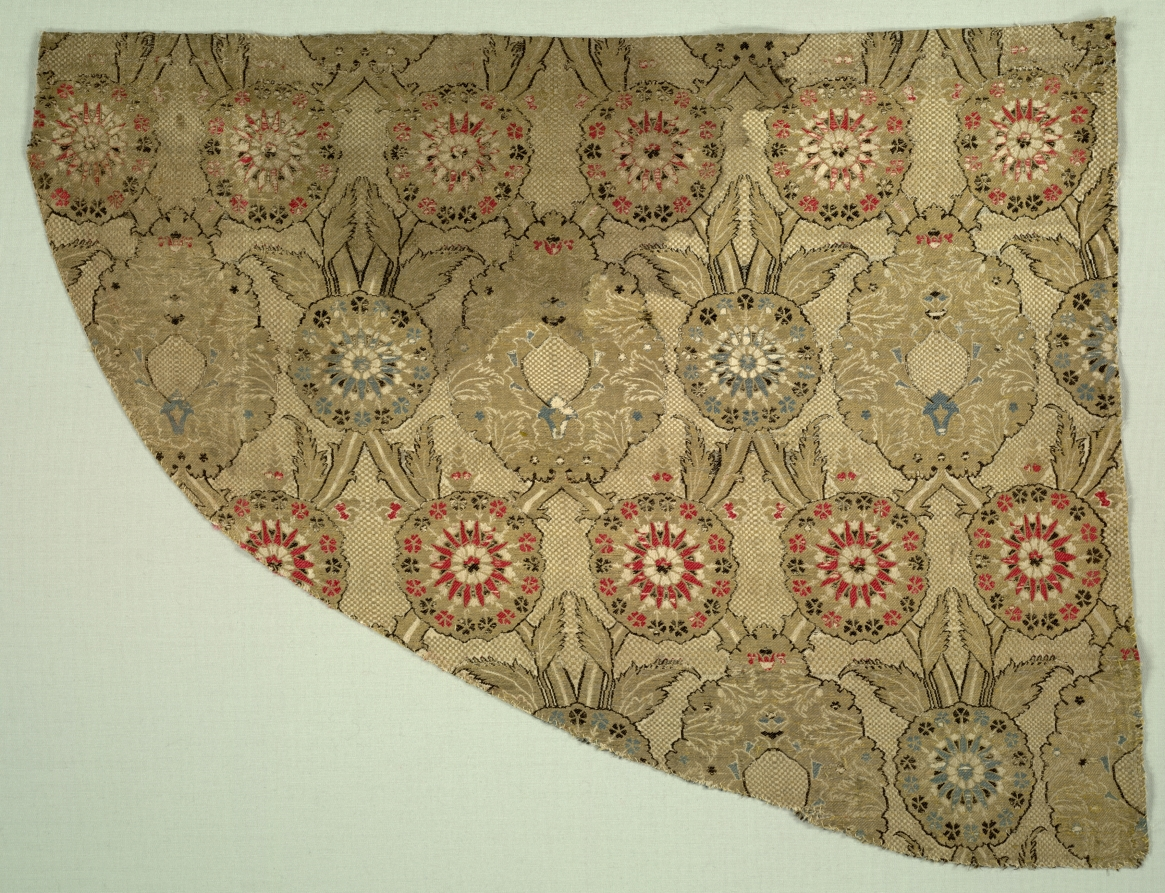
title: Lampas with double ogival floral pattern on checkered ground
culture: Turkey, Istanbul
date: 1550–1575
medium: lampas: silk and gilt-metal thread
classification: Textile